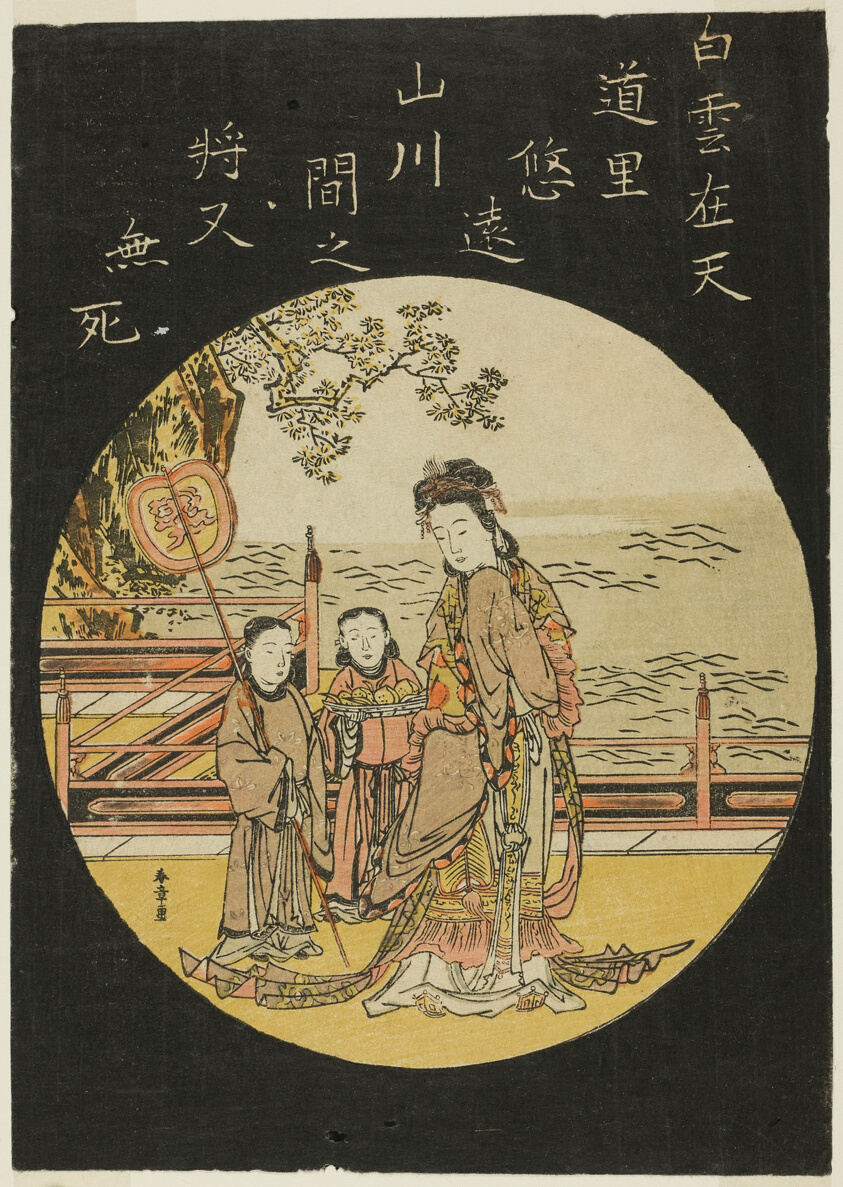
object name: Print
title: The Chinese Immortal Seiobo (C: Xi Wang Mu, Queen of the West)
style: Japanese (culture or style)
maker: Katsukawa Shunsho 勝川 春章; Japanese, 1726-1792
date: c. 1770s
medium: Color woodblock print; chuban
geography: Japan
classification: woodblock print; print; asian art